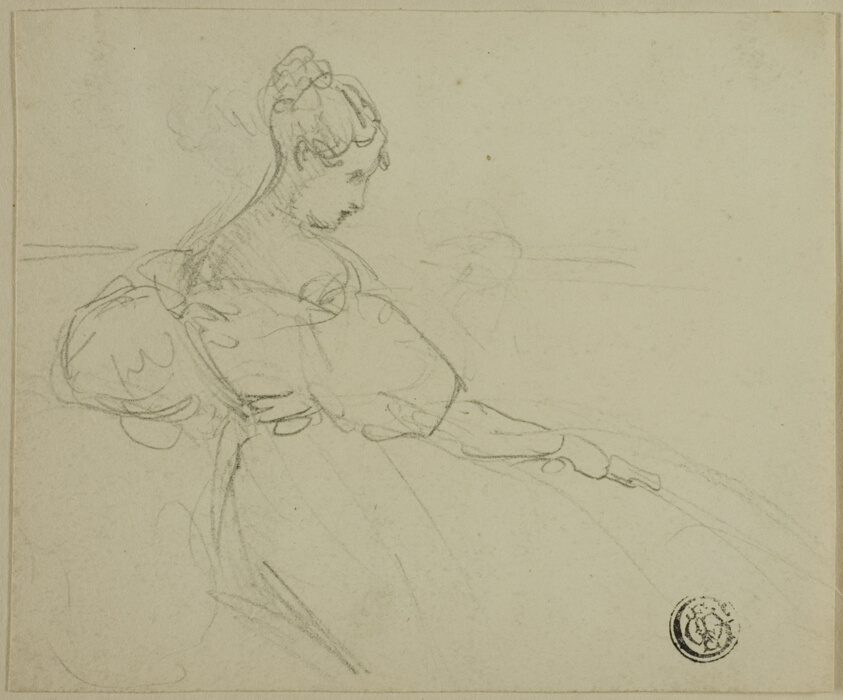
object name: Drawing and Watercolor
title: Sketch of Seated Woman in Evening Dress in Profile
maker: Unknown Artist; European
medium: Graphite on cream wove paper, tipped onto cream wove paper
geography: England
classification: graphite; drawings (visual works); prints and drawing